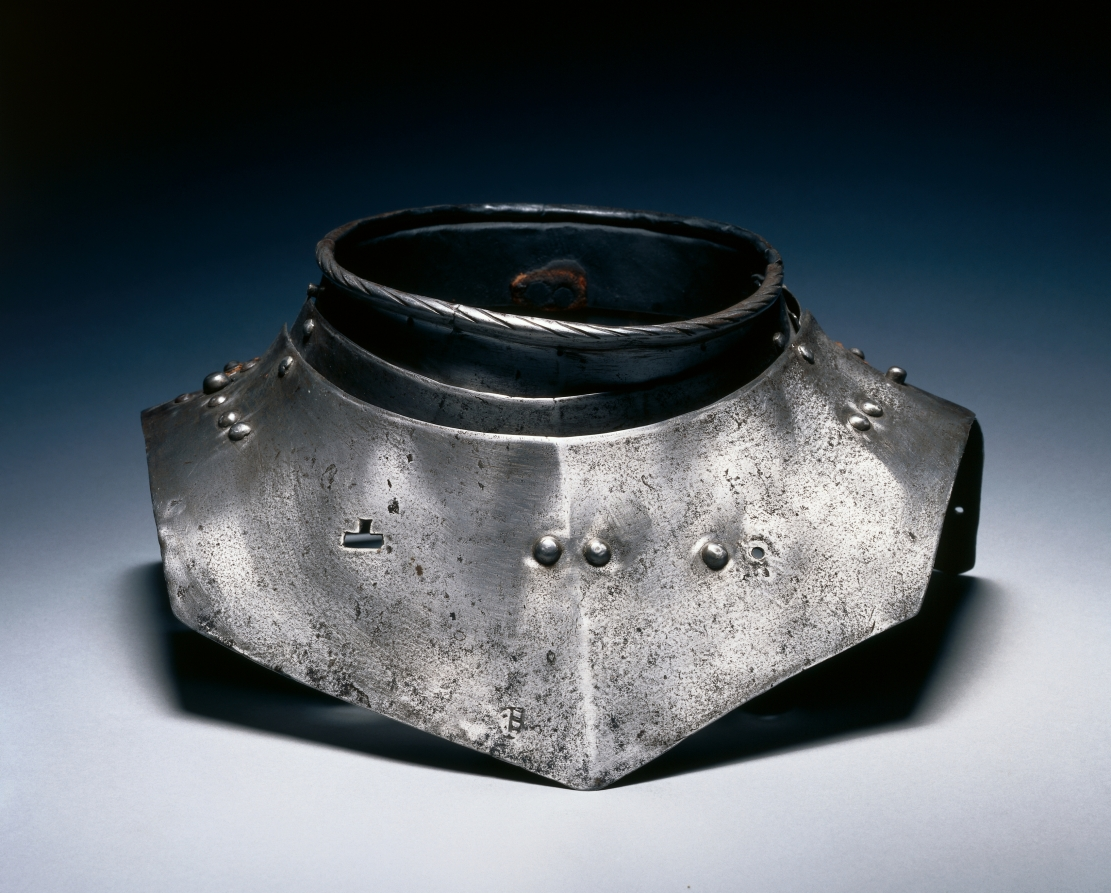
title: Gorget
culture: Germany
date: c. 1560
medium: steel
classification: Arms and Armor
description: A gorget is an element of armor that protects the neck, throat, and upper part of the chest. It normally consists of two parts, front and back, joined by a hinge on the left shoulder and fastened with a stud on the right. Gradually the gorget grew smaller and more symbolic becoming a symbol of rank. By the 1700s it became a single crescent shape worn on a chain that suspended the gorget even lower on the chest, so that it no longer protected the throat in normal wear.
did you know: This gorget has a guild mark from Nuremburg, which functioned as a seal of quality.